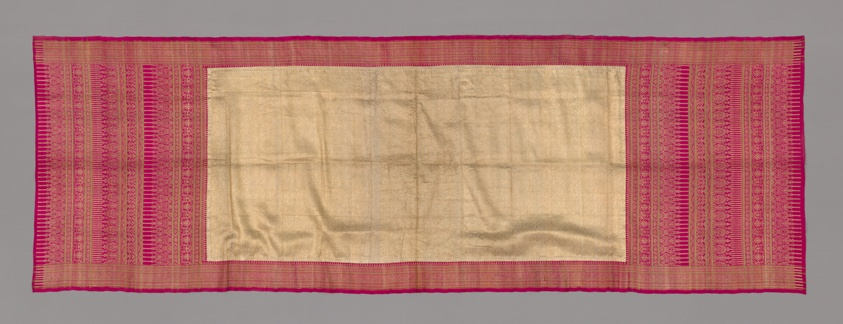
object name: Costume and Accessories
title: Sari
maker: India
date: 19th century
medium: Red silk and gold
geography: India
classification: textile; weaving; costume; dress (garment); clothing; sari (garment)